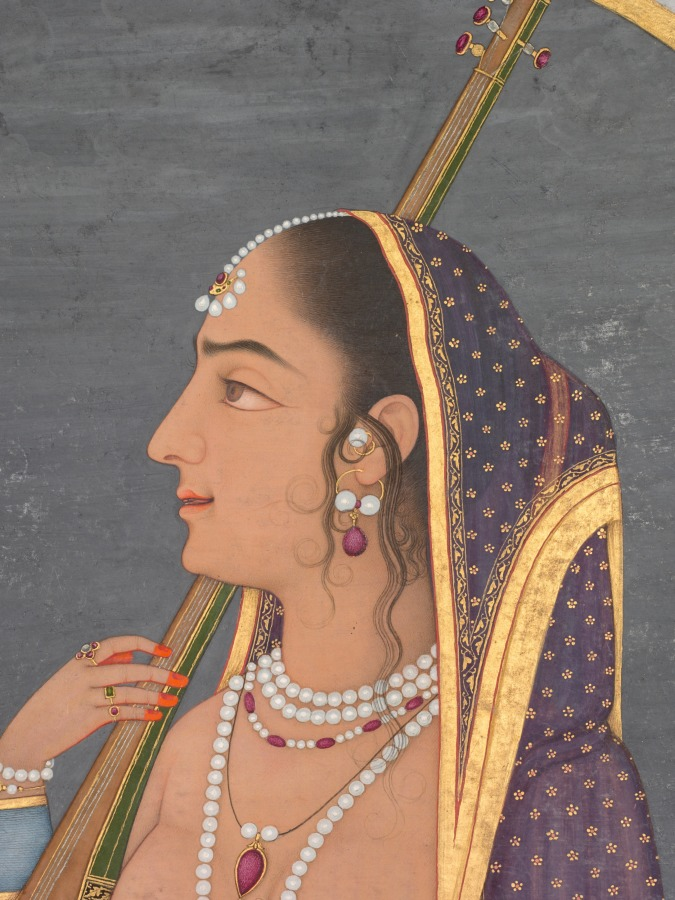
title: Court lady singing and playing the vina (recto)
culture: India, Lucknow, Mughal, 18th century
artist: attributed to Muhammad Rizavi Hindi (Indian, active mid-1700s)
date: c. 1760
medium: Gum tempera, ink, and gold on paper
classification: Painting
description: Her mouth open slightly in song, the woman’s hennaed fingers strum a three-string vina, an Indian musical instrument with a resonator made from a gourd. Music was an essential component of courtly entertainment, along with the drinking of wine and the appreciation of poetry, paintings, and jewels.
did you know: When the mouth is open, and teeth and tongue are showing, she is singing.